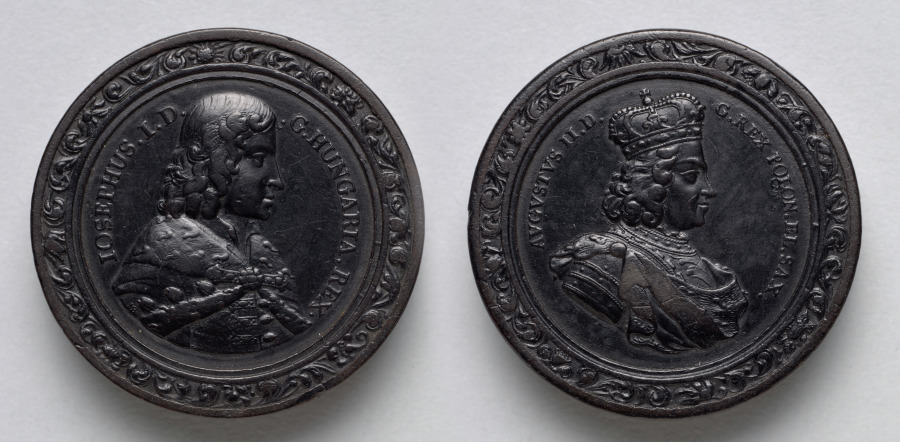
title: Gaming Piece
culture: Germany, late 17th-early 18th Century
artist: Martin Brunner (German, 1659–1725)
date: c.1700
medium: wood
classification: Furniture and woodwork